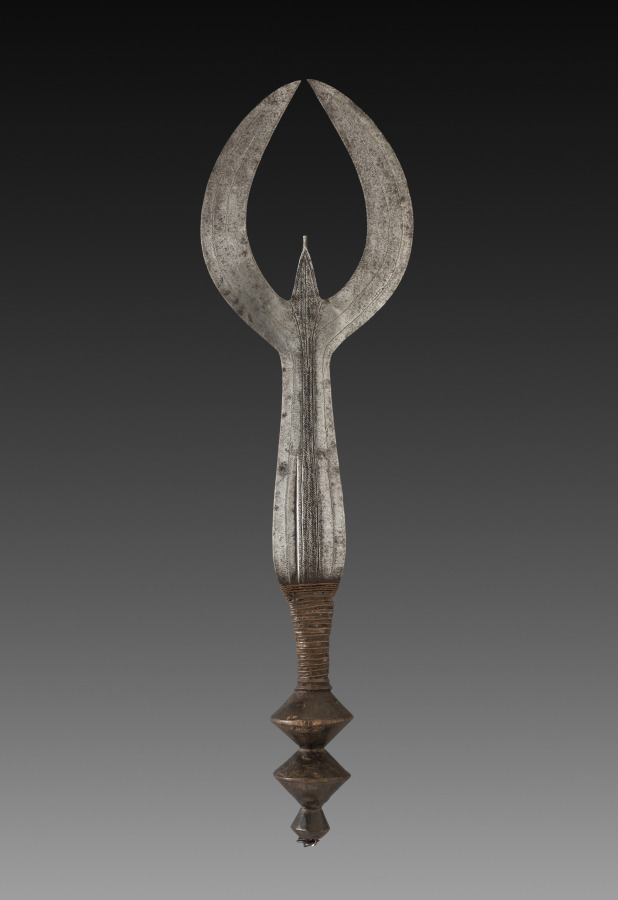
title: Sword (ngulu)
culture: Ngombe, Doko, or Iboko people, Democratic Republic of Congo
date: late 1800s to early 1900s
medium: Iron alloy, wood, and copper alloy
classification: Arms and Armor